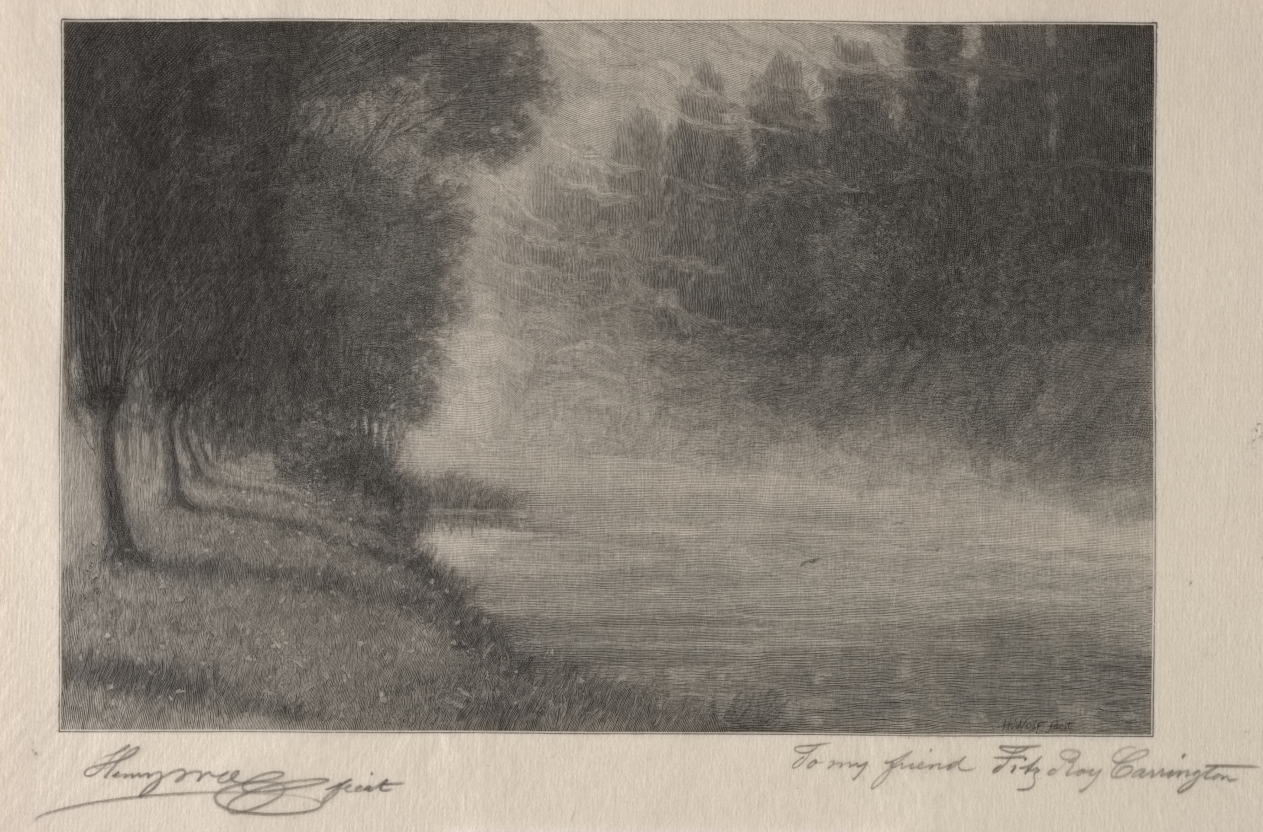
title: Morning Mists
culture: America, late 19th-early 20th century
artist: Henry Wolf (American, 1852–1916)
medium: wood engraving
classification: Print